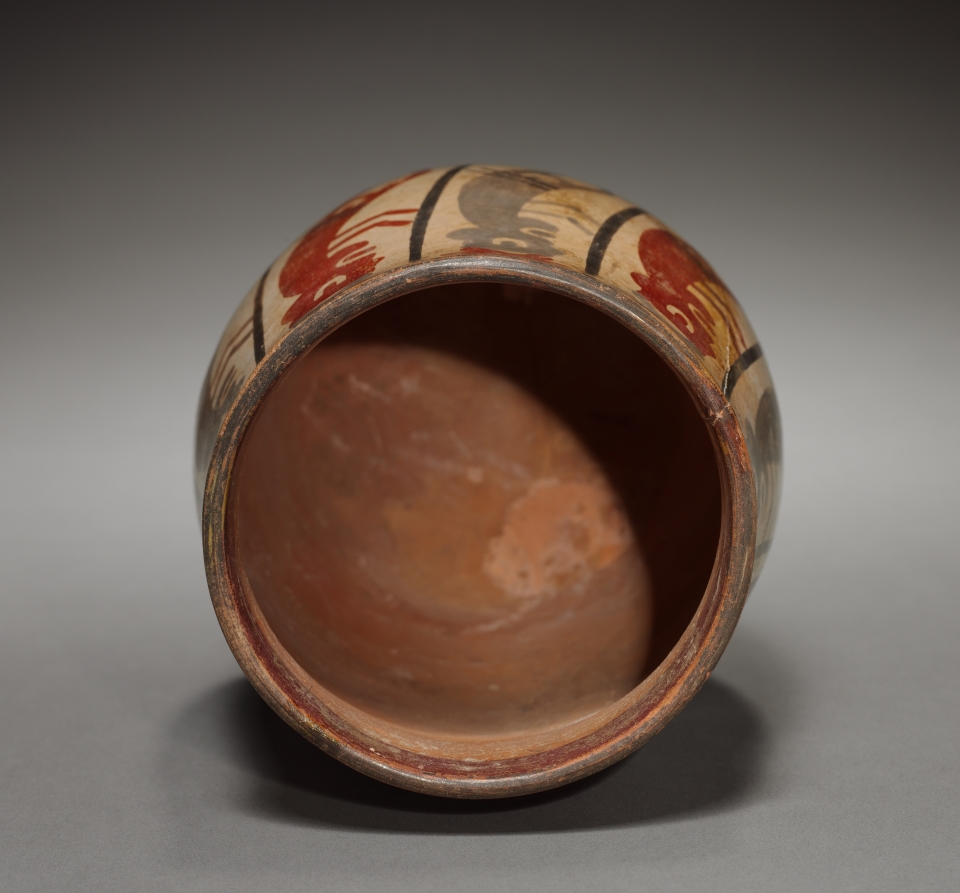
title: Vase with Procession of Warriors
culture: Peru, South Coast, Nasca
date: c. 350–600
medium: earthenware with colored slips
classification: Ceramic